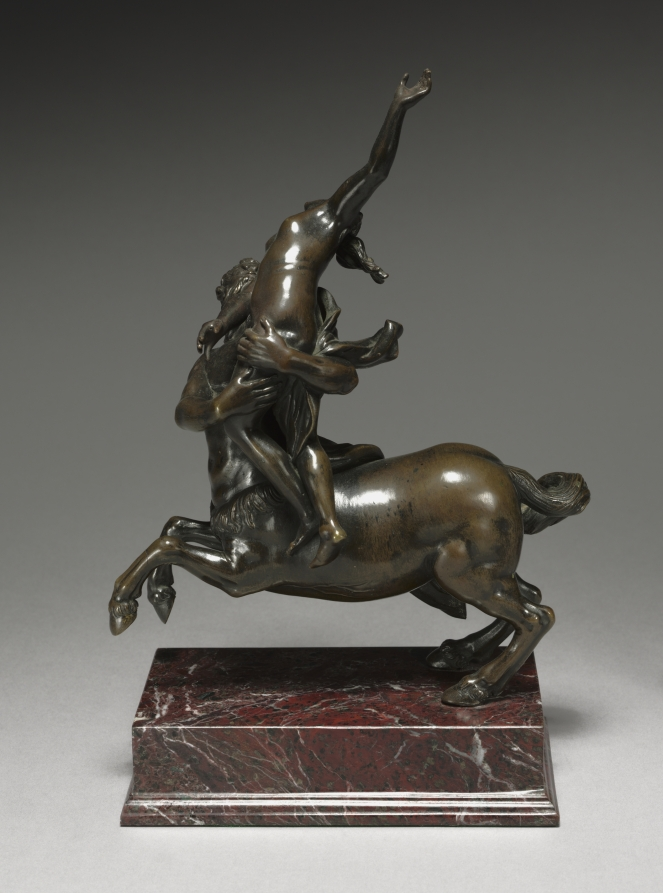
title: Nessus and Deianeira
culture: Italy, 17th century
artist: Francesco Fanelli (Italian, 1661)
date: made in England, probably 1630–40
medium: bronze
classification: Sculpture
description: Fanelli apparently came from Florence and this group clearly indicates that he was familiar with the work of Giambologna, the leading sculptor active in that city around 1600.